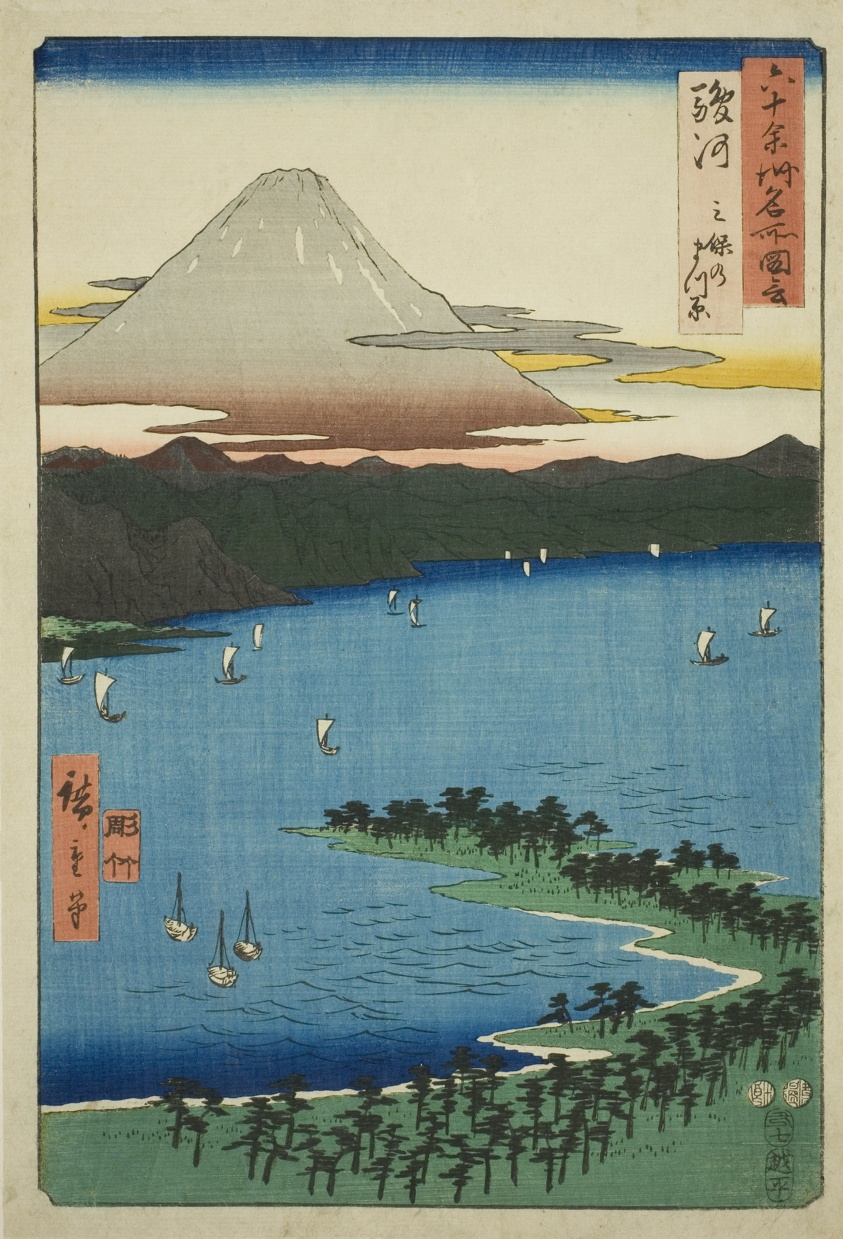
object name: Print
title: Suruga Province: The Pine Grove at Miho (Suruga, Miho no matsubara), from the series "Famous Places in the Sixty-odd Provinces (Rokujuyoshu meisho zue)"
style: Japanese (culture or style)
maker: Utagawa Hiroshige 歌川 広重; Japanese, 1797-1858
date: 1853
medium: Color woodblock print; oban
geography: Japan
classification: woodblock print; print; asian art